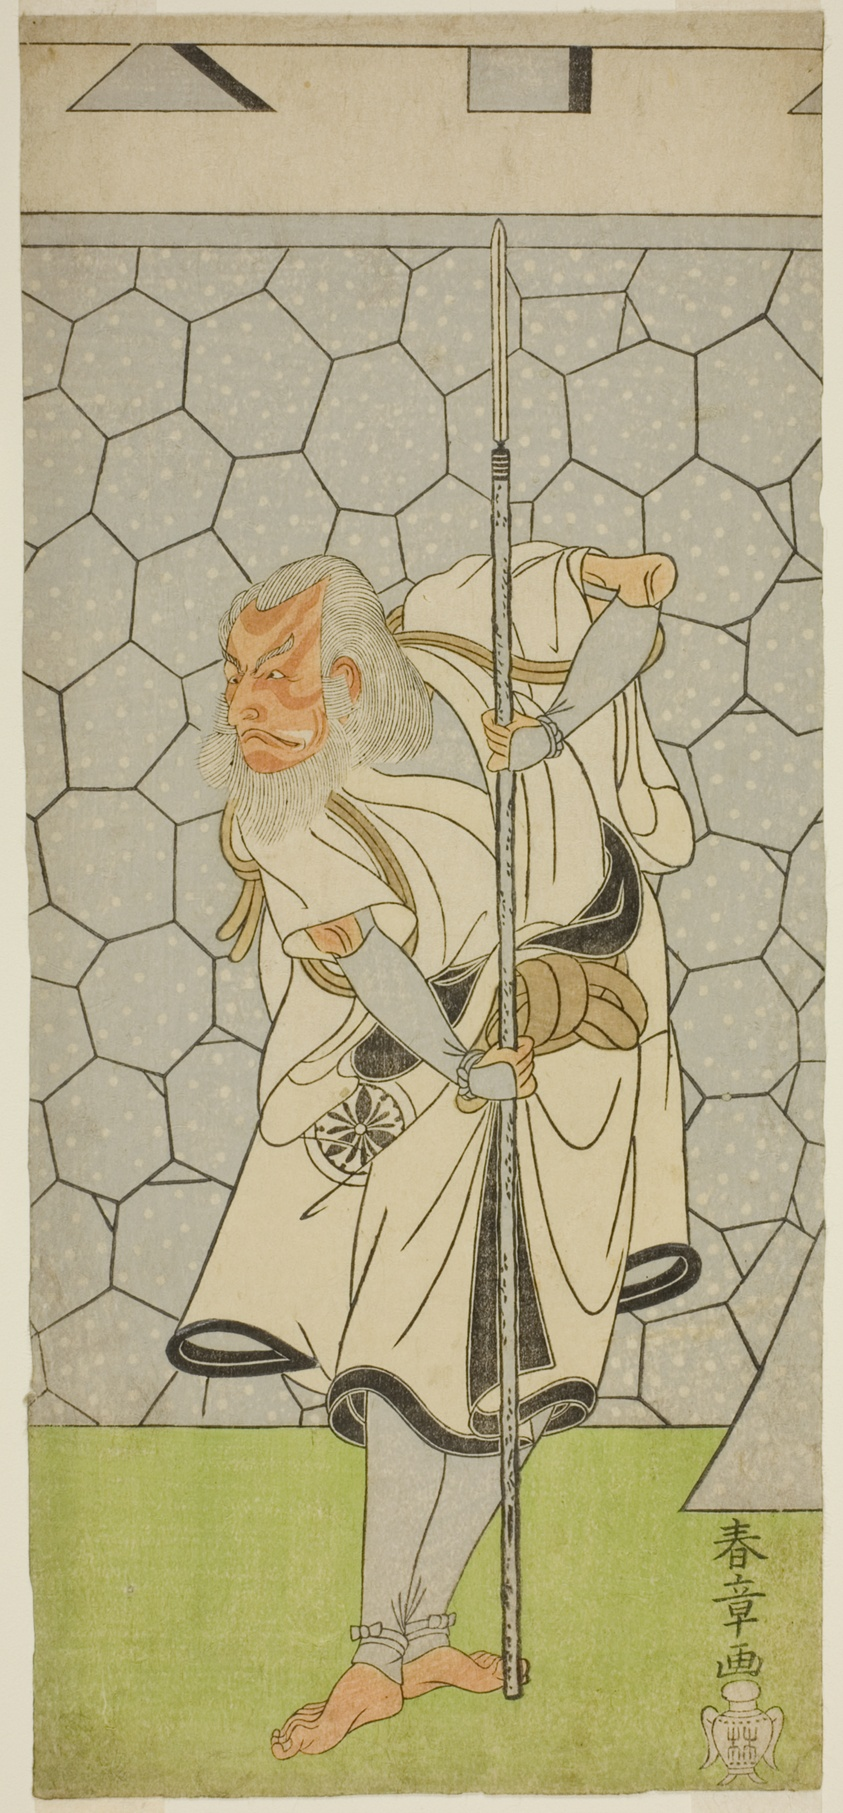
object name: Print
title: The Actor Matsumoto Koshiro III as Kikuchi Hyogo Narikage in the Play Katakiuchi Chuko Kagami, Performed at the Nakamura Theater in the Sixth Month, 1770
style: Japanese (culture or style)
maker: Katsukawa Shunsho 勝川 春章; Japanese, 1726-1792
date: c. 1770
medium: Color woodblock print; hosoban; second-from-left sheet in a four-sheet composotion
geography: Japan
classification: woodblock print; print; asian art